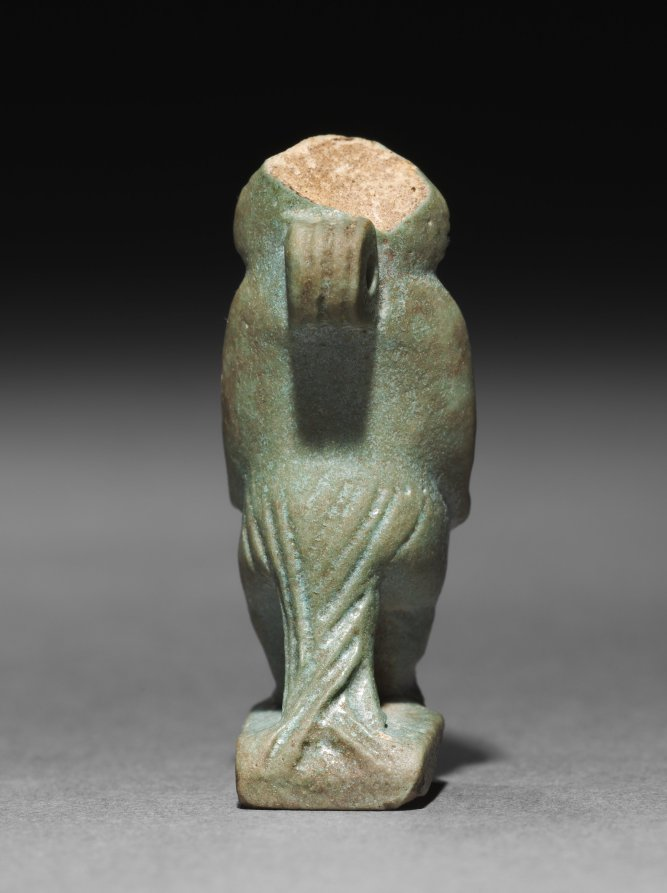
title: Baboon-Falcon Hybrid Amulet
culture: Egypt, Late period (715–332 BCE)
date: 715–332 BCE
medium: pale robin's egg blue faience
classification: Amulets